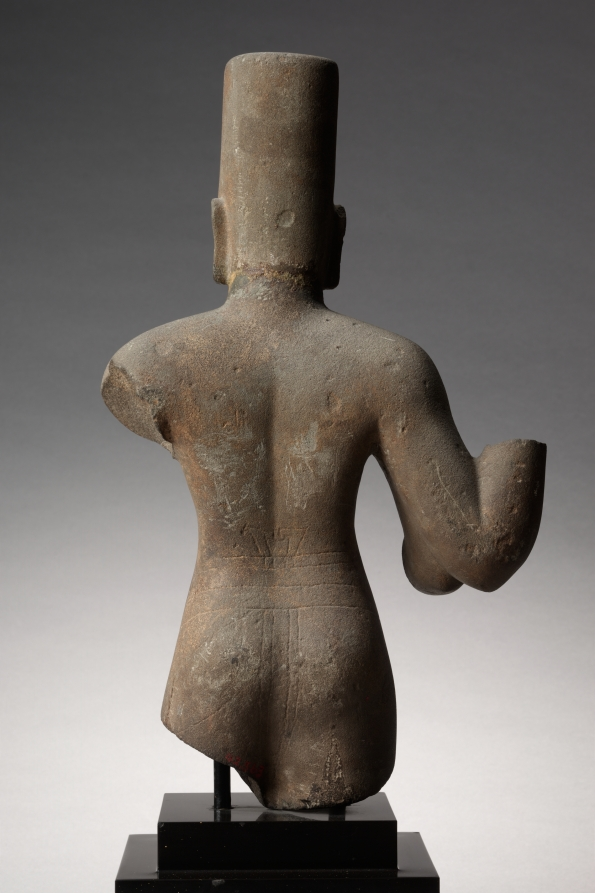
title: Vishnu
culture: Cambodia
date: 650–700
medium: sandstone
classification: Sculpture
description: Vishnu has the features of royalty, indicated by the high mitre-like crown with the flat top, distinctive to types made at the site of Prasat Andet. His status as a god, greater than any earthly king, is indicated by the four arms, traces of which are still visible. The sensitive rendering of the eyes and slight smile are characteristics of Cambodian sculpture, and during this early period, the form of the body reveals some relatively naturalistic musculature and treatment of the garments. He wears the Southeast Asian lower garment called sampot, around which his upper garment is loosely tied. It is Vishnu who incarnates himself into the world in avatars, including Krishna and the boar Varaha. Here we see his iconic form as Vishnu himself.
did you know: The deity is four-armed with the arms running parallel from the shoulders and then bifurcating at the elbows.